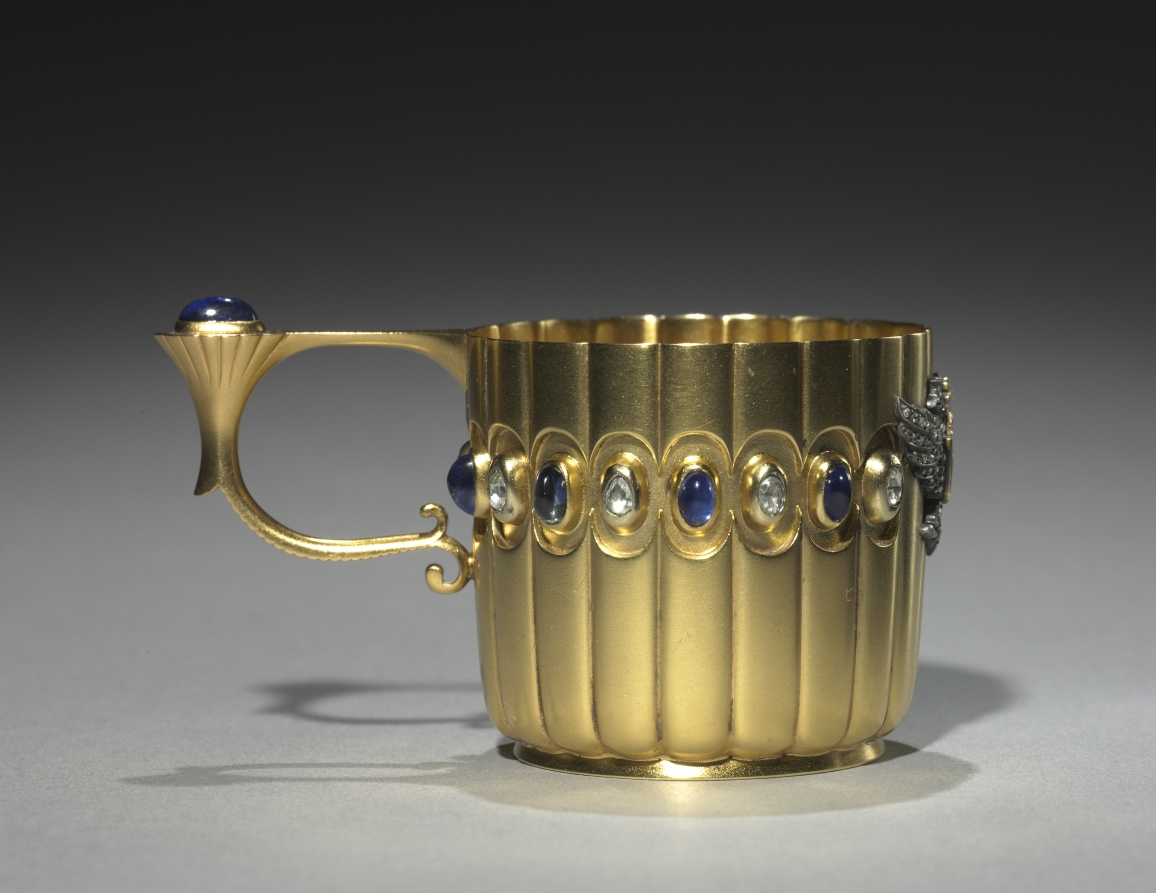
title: Miniature Cup (Kovsh)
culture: Russia, St. Petersburg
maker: House of Fabergé (Russian, 1842–1918)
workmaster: Mikhail Evlampievich Perkhin (Russian, 1860–1903)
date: c. 1886–1896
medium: gold, diamonds, sapphires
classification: Metalwork